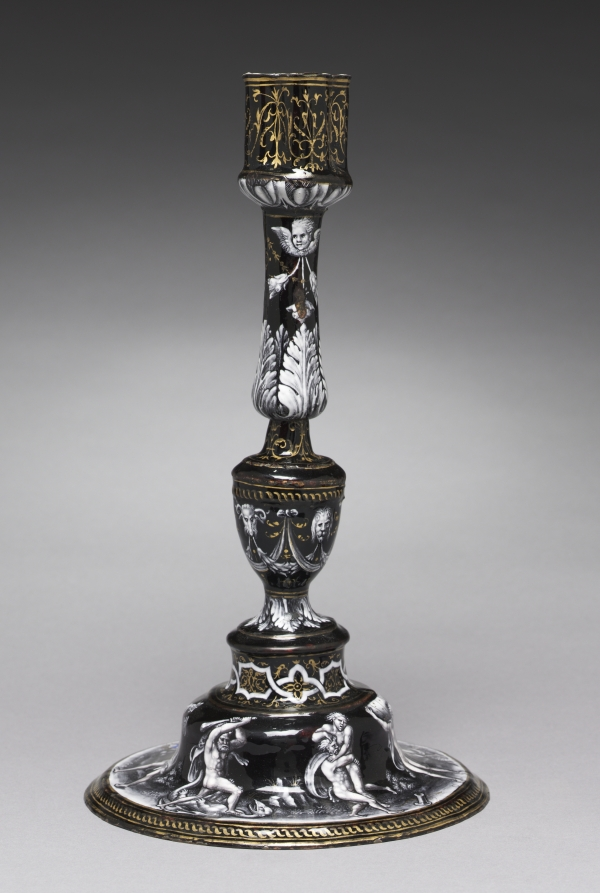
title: Candlestick Depicting Five of the Seven Labors of Hercules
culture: France, Limoges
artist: attributed to Jean II de Court (French, before 1583)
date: c. 1565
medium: painted enamel (grisaille) on copper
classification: Enamel